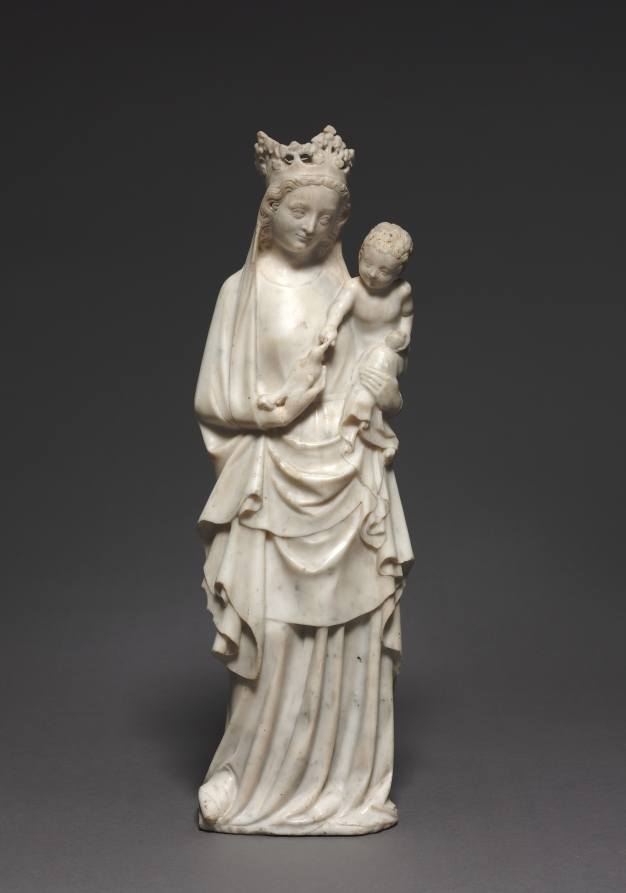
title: Virgin and Child with a Bird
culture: France, Île-de-France, Paris, 14th century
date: c. 1350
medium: marble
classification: Sculpture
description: The Virgin and Child represents one of the most frequent subjects for free-standing sculpture in 14th-century France, motivated by the developing cult of the Virgin and increasing veneration of Mary. Such sculptures were not restricted to churches, but were also found in roadside shrines, entrances to towns, and domestic use in private chapels. The small scale of this statuette suggests it was made for private veneration. The bird, held in the Virgin’s right hand, was a well-known symbol of the human soul and represents Christ’s role as redeemer of humankind.